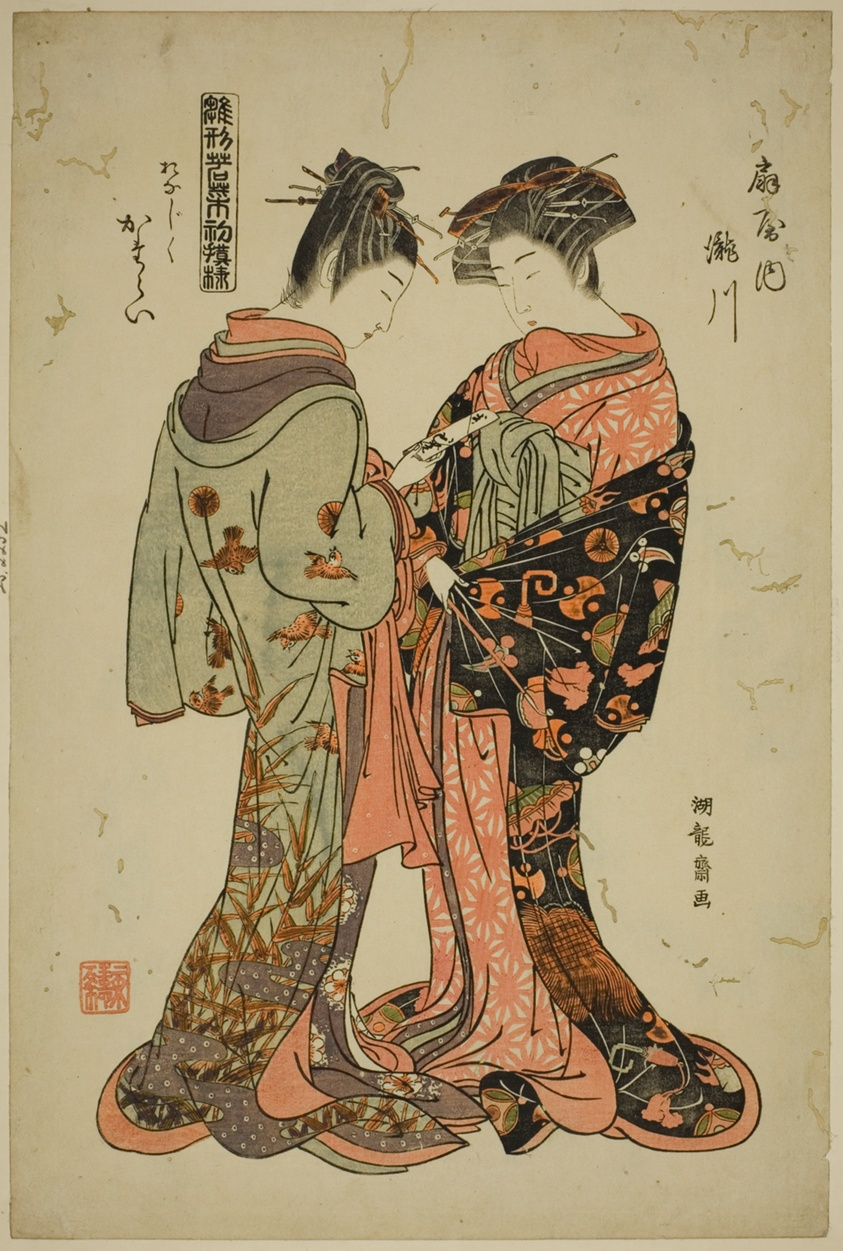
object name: Print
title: Takigawa and Katarai of the Ogiya, from the series "Models for Fashion: New Designs as Fresh as Young Leaves (Hinagata wakana hatsu moyo)"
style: Japanese (culture or style)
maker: Isoda Koryusai (Japanese, 1735-1790)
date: c. 1776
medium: Color woodblock print; oban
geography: Japan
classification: woodblock print; print; asian art